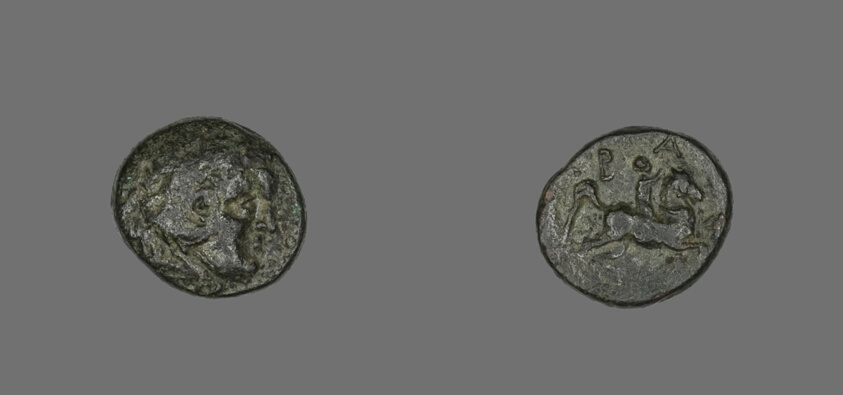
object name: Coin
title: Coin Depicting Herakles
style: greek, ancient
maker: Greek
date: 220-178 BCE, issued by Philip V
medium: Bronze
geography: Greece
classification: coin; ancient art; struck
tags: Heracles